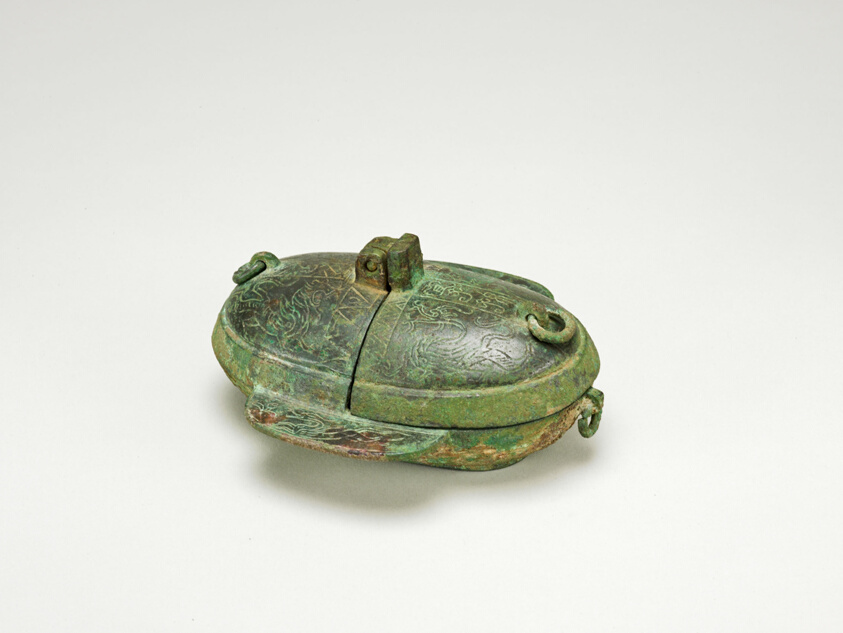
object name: Vessel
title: Folding Oil Lamp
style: Chinese (culture or style)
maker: China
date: Han dynasty, 206 BCE–220 CE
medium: Bronze with incised decoration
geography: China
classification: bronze; metalwork; asian art; vessel